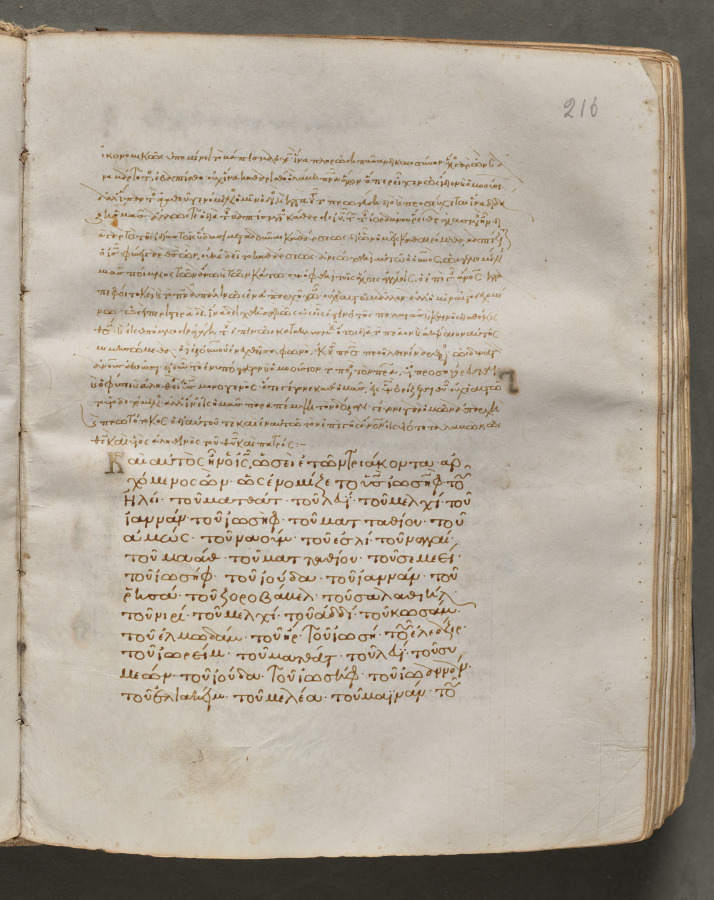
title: Text, folio 216 (recto), from a Gospel Book with Commentaries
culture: Byzantium, Constantinople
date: c. 1000–1100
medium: ink, tempera, and gold on vellum; leather binding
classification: Bound Volume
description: Each of the four gospels in this book opens on a page with brilliantly illuminated borders depicting the author of the text as well as birds-principally peacocks, symbols of the immortality of the soul-and fountains, representing the fountain of life and the salvation of the soul. This volume consists of 428 leaves with texts in Greek. Its level of sophistication suggests that it was probably written and decorated in a monastery in Constantinople.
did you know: Gospel Books were carried in procession through Byzantine churches.